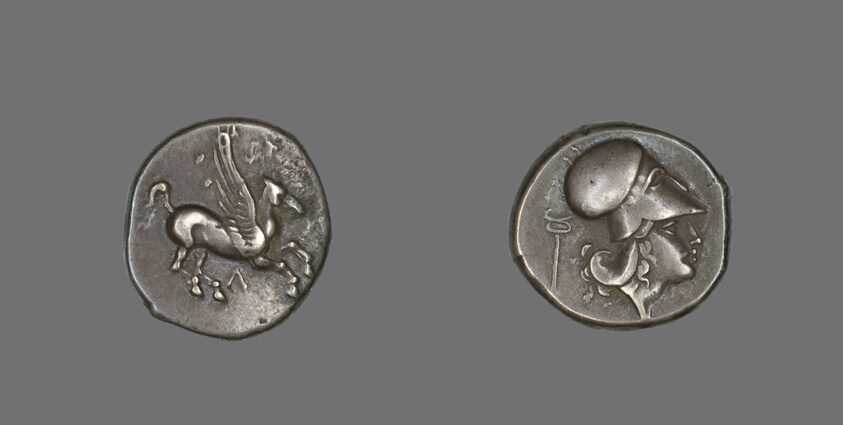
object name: Coin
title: Stater Coin Depicting Pegasus Flying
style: greek, ancient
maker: Greek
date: 400-330 BCE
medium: Silver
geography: Levkás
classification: coin; ancient art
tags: mythological figures, helmets, pegasus